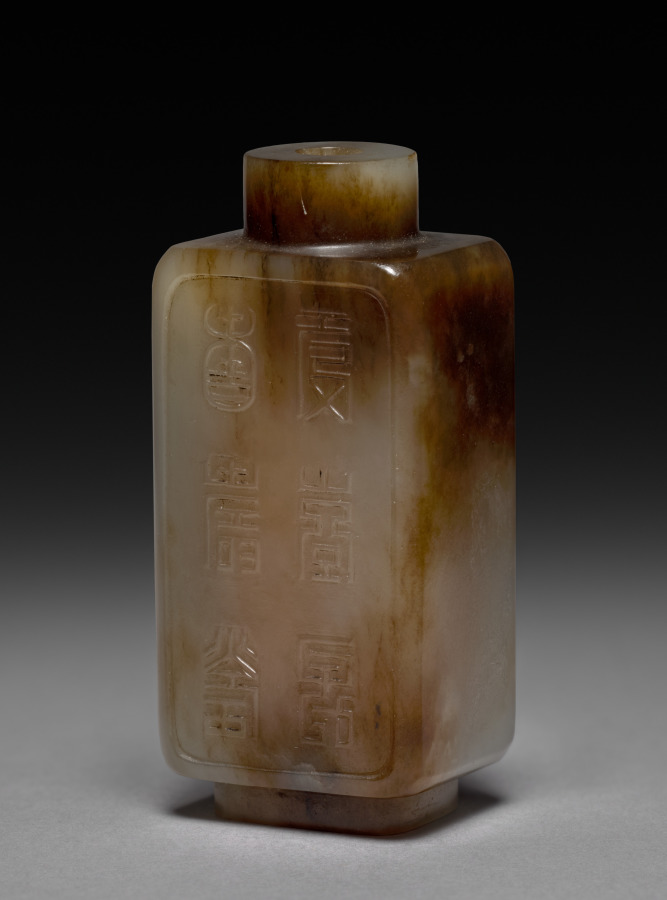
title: Snuff Bottle with Stopper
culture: China, Qing dynasty (1644–1911), Qianlong reign (1736–95)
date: 1736–95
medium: jade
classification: Jade